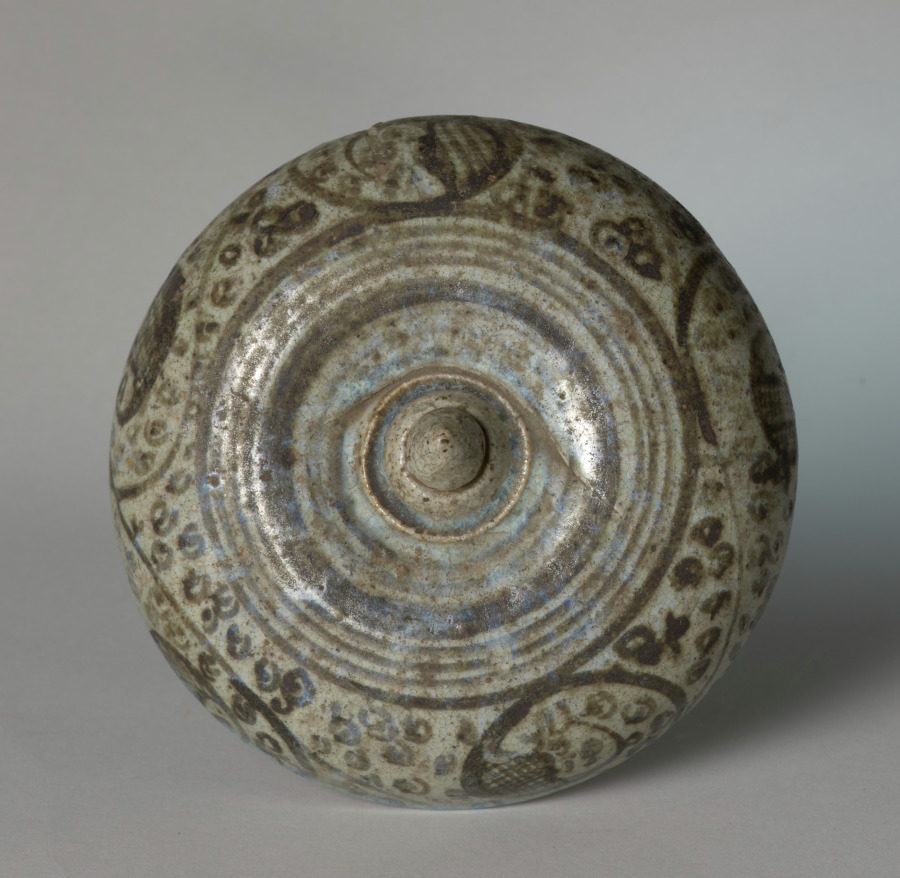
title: Covered Bowl with Painted Decoration (lid)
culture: Siam, Sawankhalok ware, 15th century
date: 1400s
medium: stoneware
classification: Ceramic